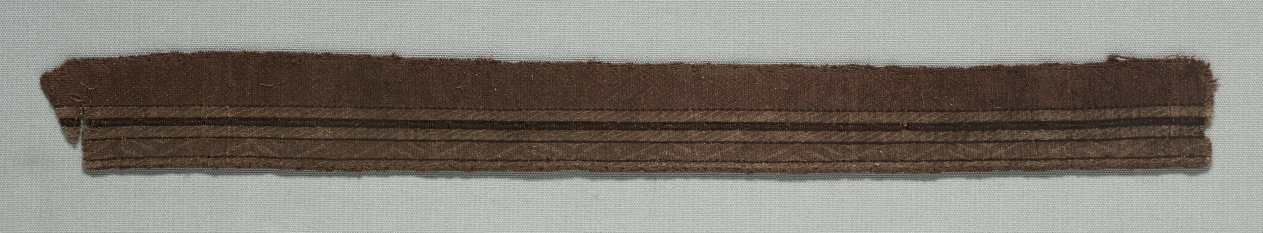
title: Fragment of a Band (1 of 2)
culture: Italy, Sicily, end of 11th century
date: late 1000s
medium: tablet weave; silk and gold metal thread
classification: Textile